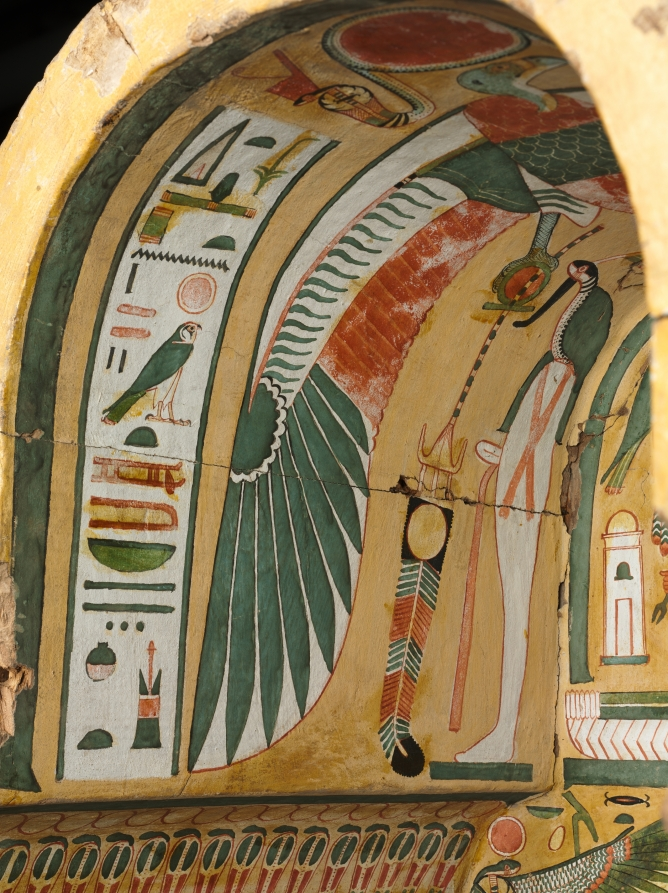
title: Coffin of Bakenmut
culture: Egypt, Thebes, Third Intermediate (1069–715 BCE), Dynasties 21–22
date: c. 1000–900 BCE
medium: gessoed and painted sycamore fig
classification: Funerary Equipment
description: The coffin of Bakenmut is one of the finest examples of painted wooden coffins made for the priests of Amen and their families at Thebes during Dynasty 21 and early Dynasty 22. The pharaohs of this time were no longer buried in the Valley of the Kings, but instead built tombs in the Delta, far to the north, where they resided. Security was lax in the Theban necropolis. The coffins and funerary goods of the wealthy citizens of Thebes were placed in unmarked and undecorated family tombs cut into the cliffs on the west bank of the Nile. All the care and detail that in more prosperous times were devoted to the decoration of the tomb chapel were now lavished on the elaborately painted coffins. Every available surface is crowded with religious scenes, images of funerary gods and goddesses, protective spells, and magical symbols. The deceased appears mummiform. An elaborate floral collar entirely covers the upper body, exposing only the separately attached hands (now lost). A pair of red "mummy braces" are crossed over the chest, their point of intersection marked by a winged sun disk. The lower body is covered with tiny figures modeled in gesso against a yellow background, which gives the effect of gold inlaid with glass or semiprecious stone. The decoration on the interior features two deified dead kings of Dynasty 18. Although these rulers had lived centuries before, memory of their greatness was still very much alive. The main scene near the top depicts Tuthmosis III, the great military pharaoh, who lived 500 years before Bakenmut. Posed as a mummy, the ruler wears a brilliant feathered garment enfolding him with falcon’s wings. The scene below features back-to-back seated images of Amenhotep I, regarded as the patron of the Theban cemetery and worshiped as a local god there.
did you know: Originally another smaller coffin was placed inside this outer coffin and in that the deceased with a mummy board would have rested.